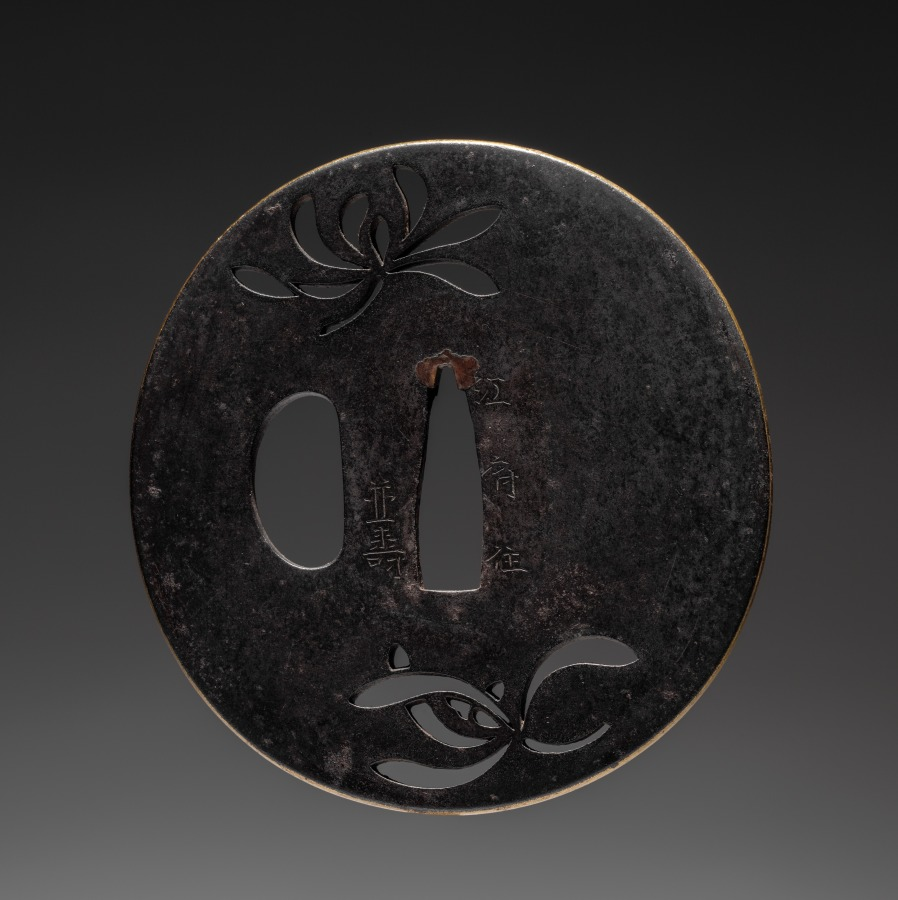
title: Sword Guard (Tsuba)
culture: Japan, Edo period (1615–1868)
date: mid-1800s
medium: iron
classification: Arms and Armor